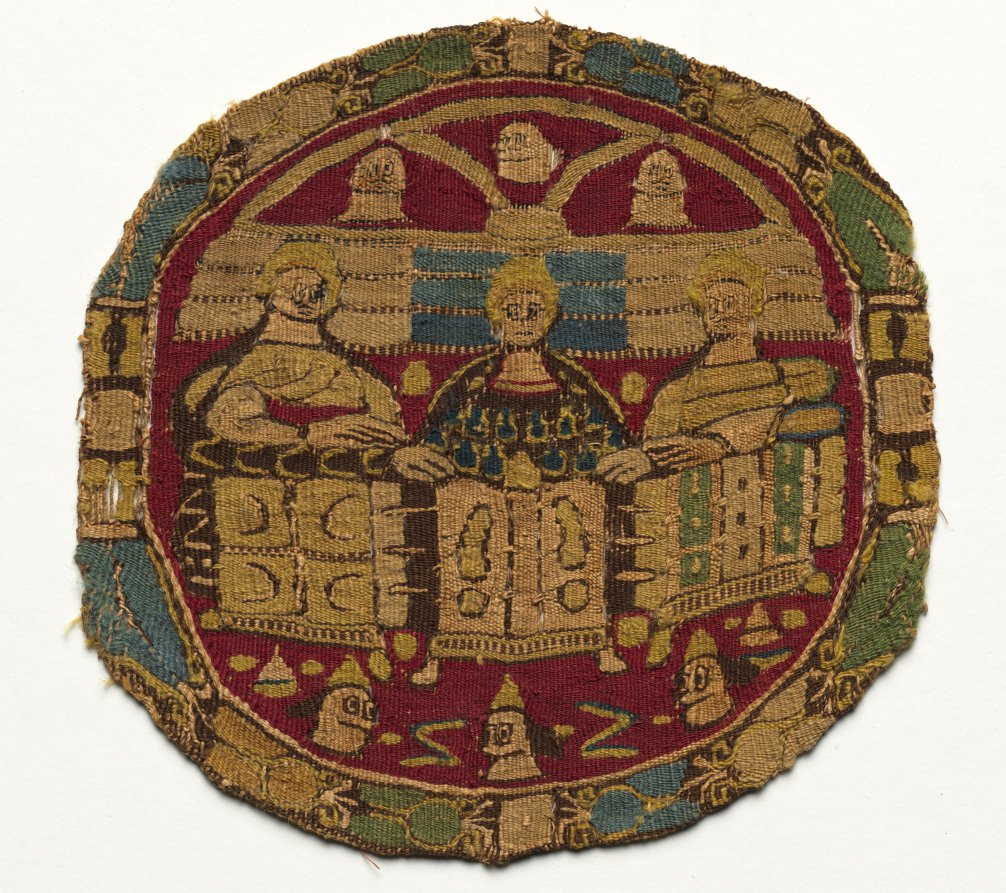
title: Segmenta (1 of 2)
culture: Egypt, Abbasid period (?), 8th - 9th century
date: 700s–800s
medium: Linen and wool; tapestry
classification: Textile